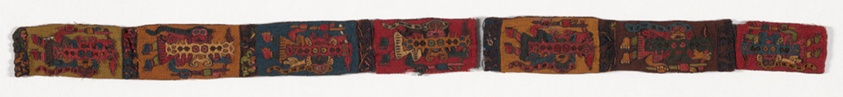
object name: Textile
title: Fragments (Border)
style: nazca, paracas, andean, andes, Pre-Columbian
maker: Nazca; Peru, south coast, Nazca Valley, Coyungo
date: 100 B.C./A.D. 200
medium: Cotton, plain weave; embroidered with camelid wool and cotton in stem and running stitches.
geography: Peru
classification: textile; needlework (visual works)